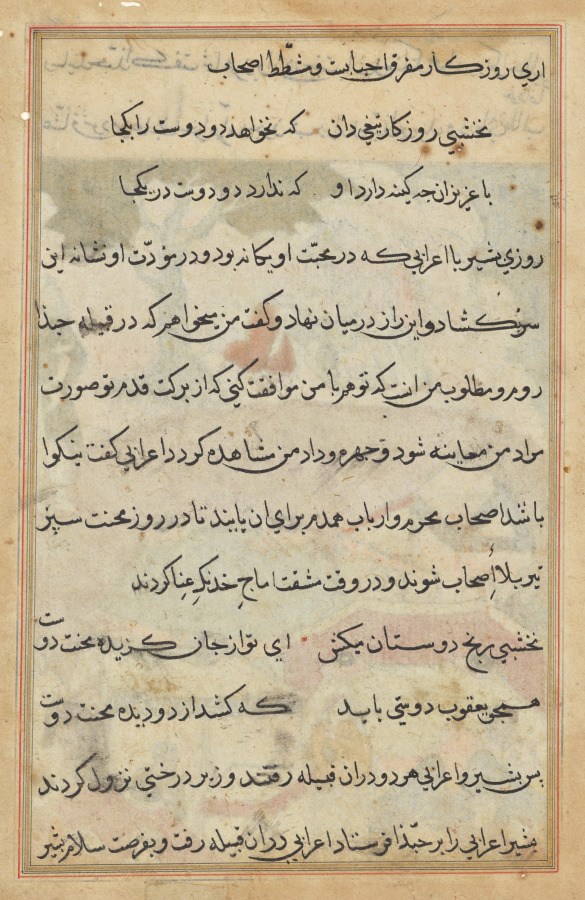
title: Page from Tales of a Parrot (Tuti-nama): text page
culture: Mughal India, court of Akbar (reigned 1556–1605)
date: c. 1560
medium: gum tempera, ink, and gold on paper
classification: Painting